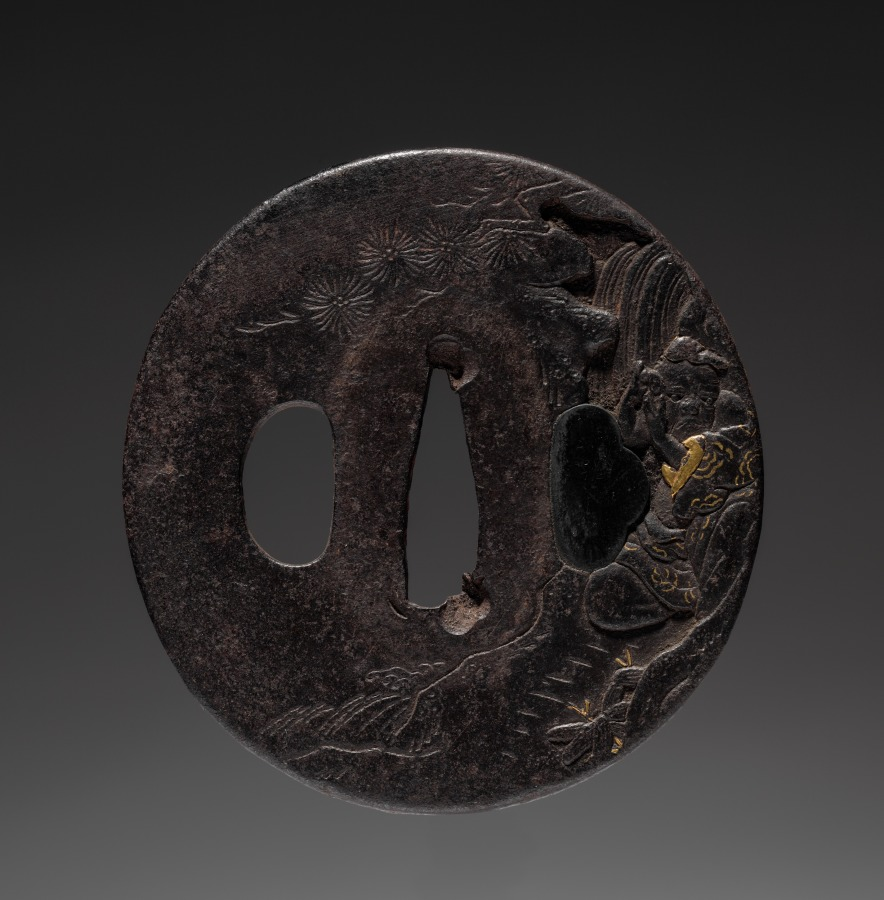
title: Sword Guard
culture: Japan, Edo period (1615–1868)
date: early 1700s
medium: iron (Nara type)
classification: Arms and Armor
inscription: signed "Toshinaga" [1669-1736].